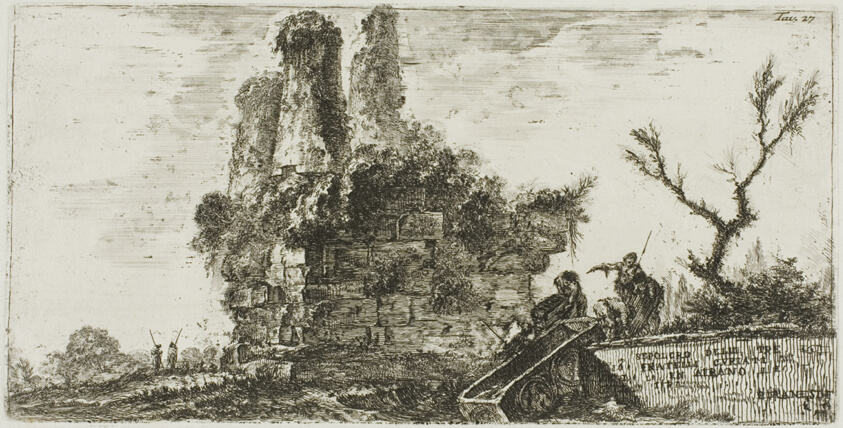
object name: Print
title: Tomb of the three Curiatii brothers in Albano, plate 27 from Some Views of Triumphal Arches and other monuments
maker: Giovanni Battista Piranesi (Italian, 1720-1778)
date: 1748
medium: Etching on ivory laid paper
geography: Italy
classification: etching; print; prints and drawing